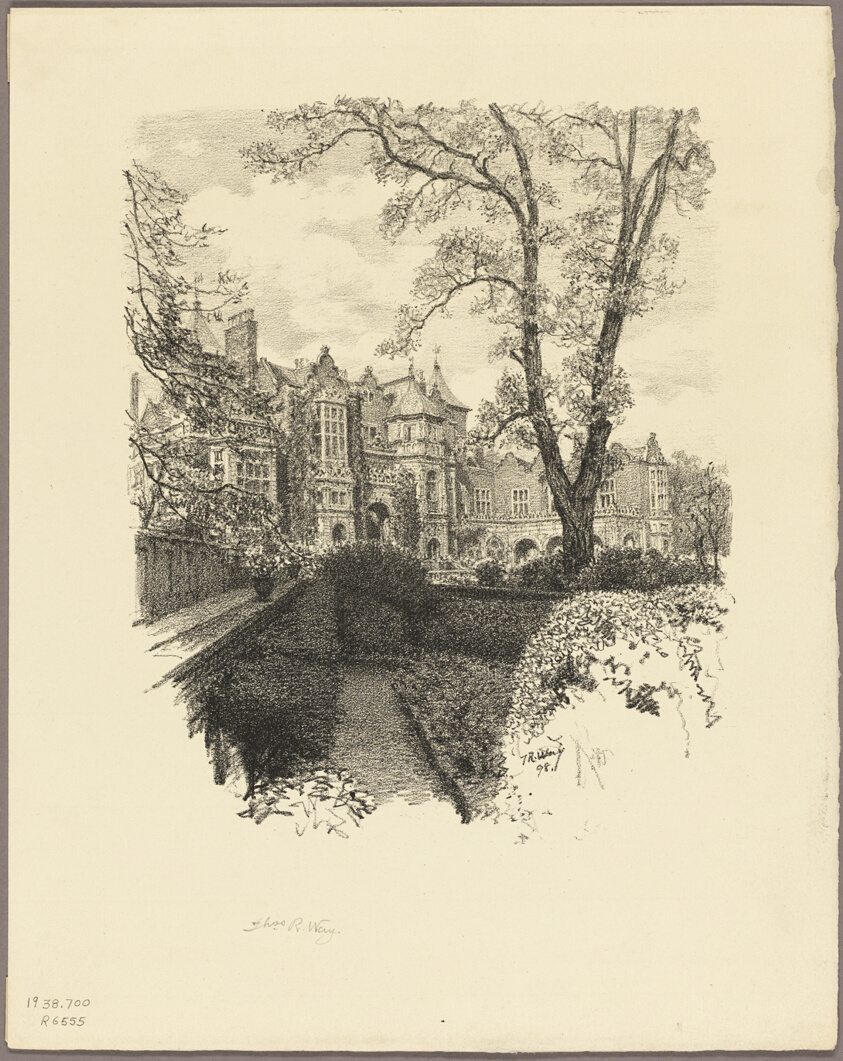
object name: Print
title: Holland House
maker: Thomas Robert Way (English, 1861-1913)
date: 1898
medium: Lithograph in black on cream laid paper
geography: England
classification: lithograph; print; prints and drawing